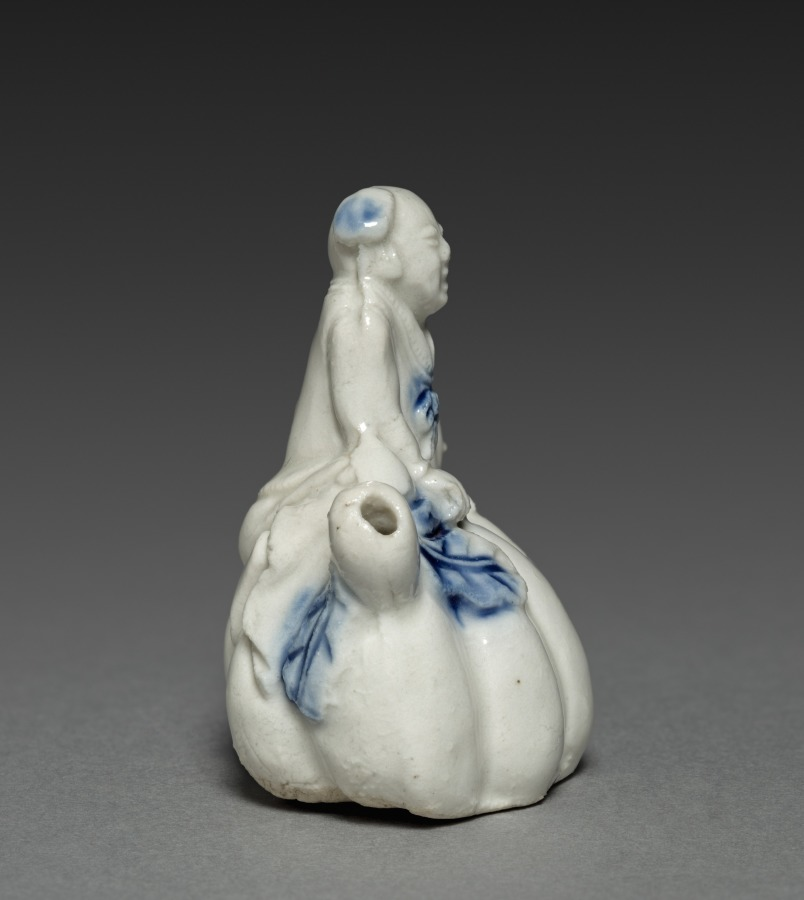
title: Waterdropper in Shape of Chinese Boy Seated on a Gourd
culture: Japan, Edo period (1615–1868)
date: 1700s to mid-1800s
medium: porcelain, molded and carved, with underglaze blue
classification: Ceramic